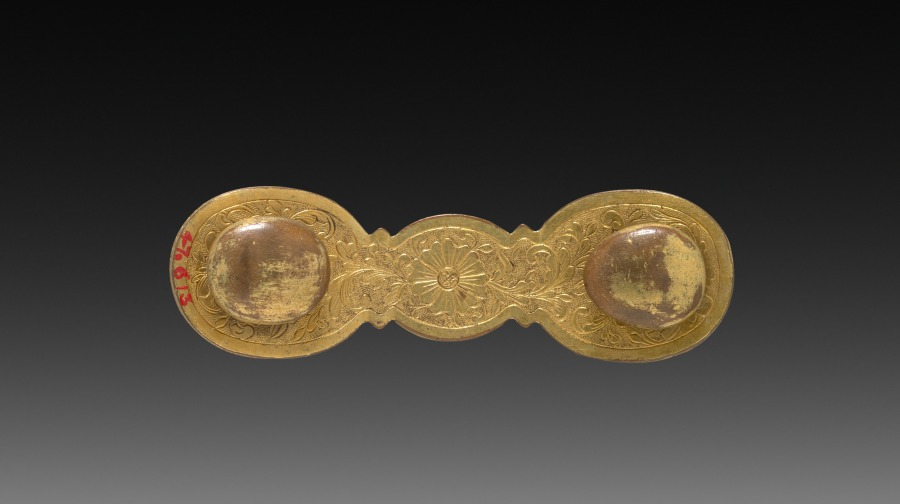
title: Buckle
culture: China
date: 1900s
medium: brass or bronze gilt, engraved and set with three onxy stones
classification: Jewelry